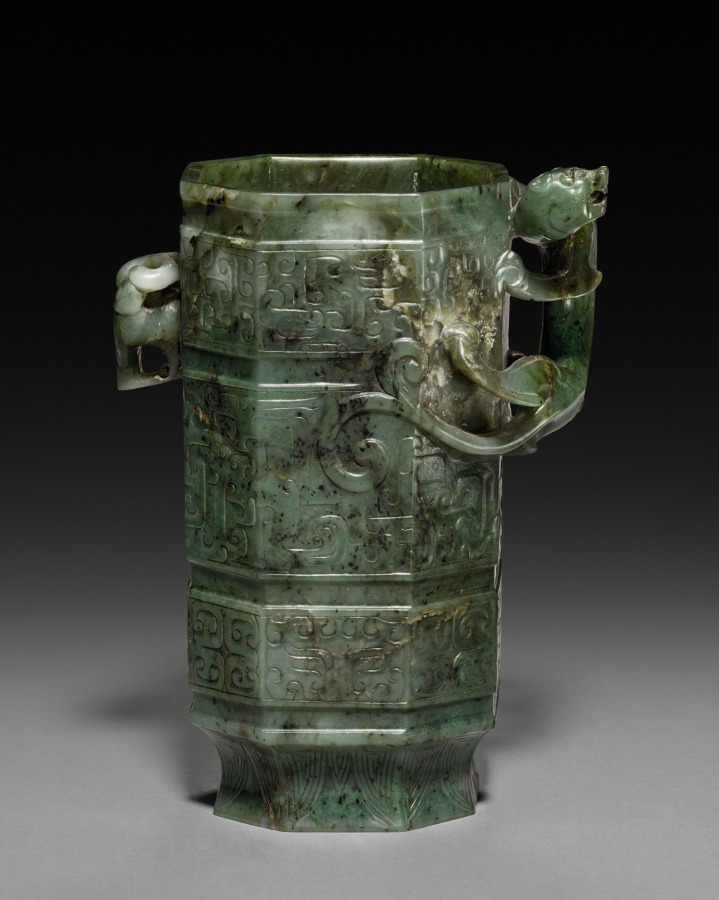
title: Octagonal Ewer with Dragon Handle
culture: China, Qing dynasty (1644–1911), Qianlong reign (1736–95)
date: 1736–95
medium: jade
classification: Jade